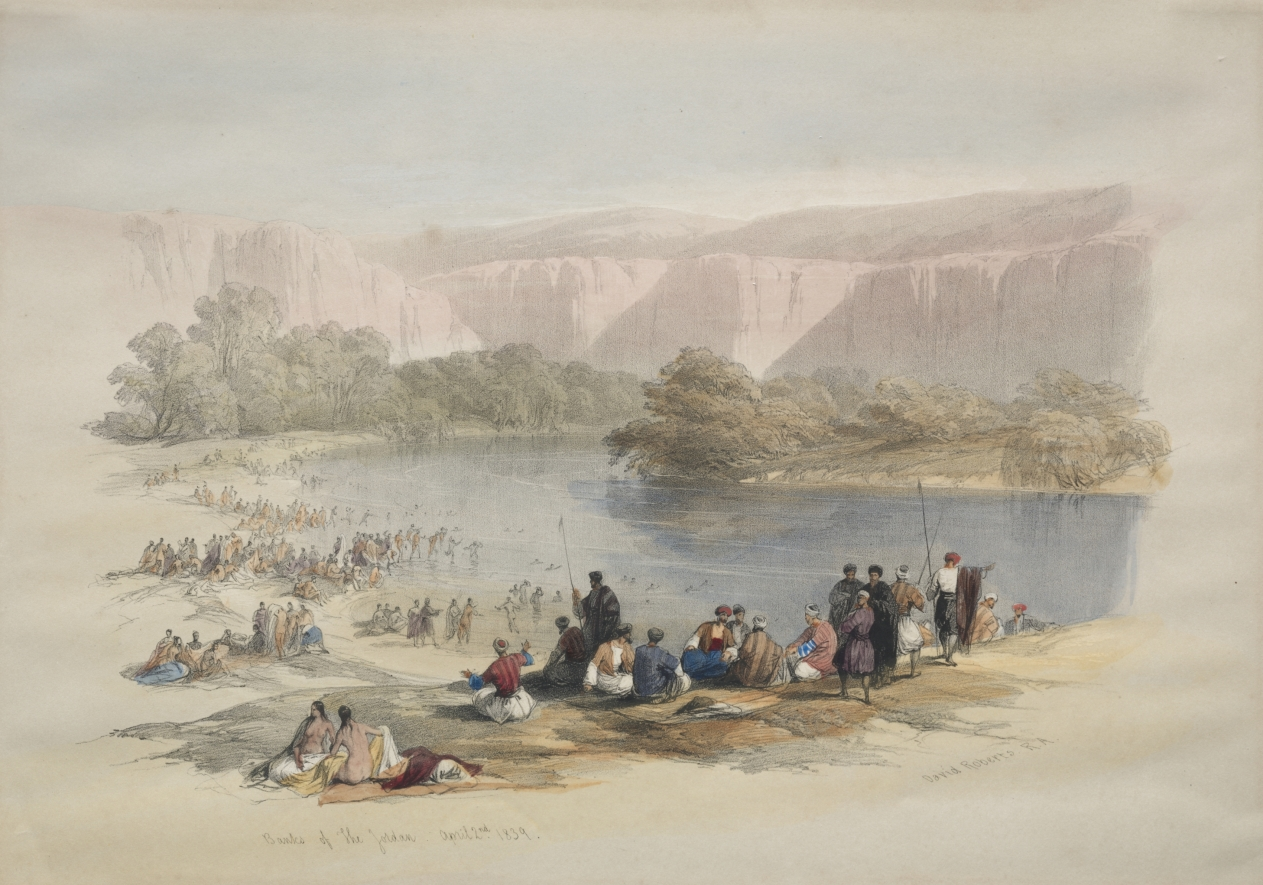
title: Banks of the Jordan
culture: England, 19th century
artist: David Roberts (Scottish, 1796–1864)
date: 1839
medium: color lithograph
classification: Print